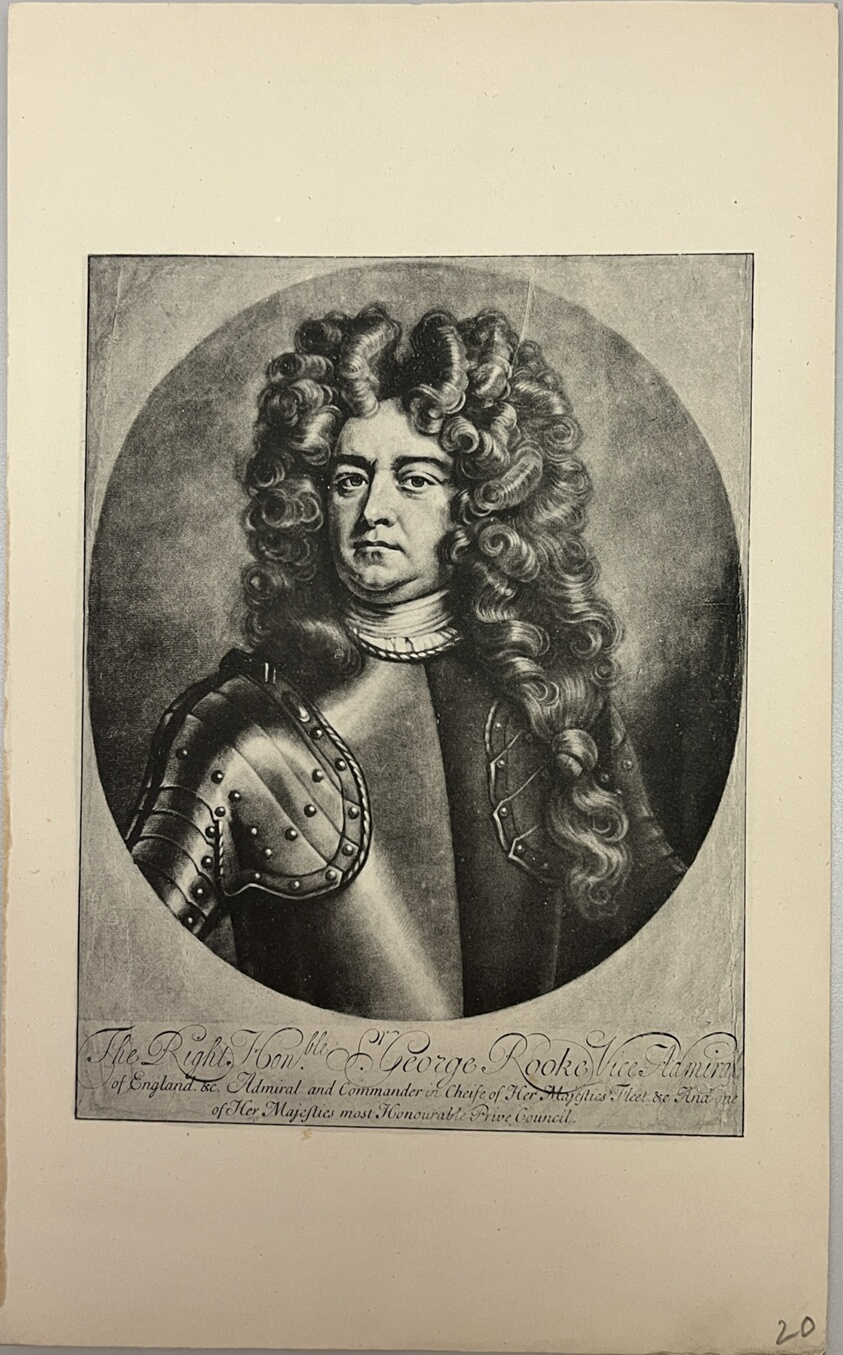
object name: Print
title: George Rooke Vice Admiral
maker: Artist Unknown (Likely American or British, 19th century)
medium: Photolithograph on paper laid on paper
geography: United States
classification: reproduction; print; prints and drawing